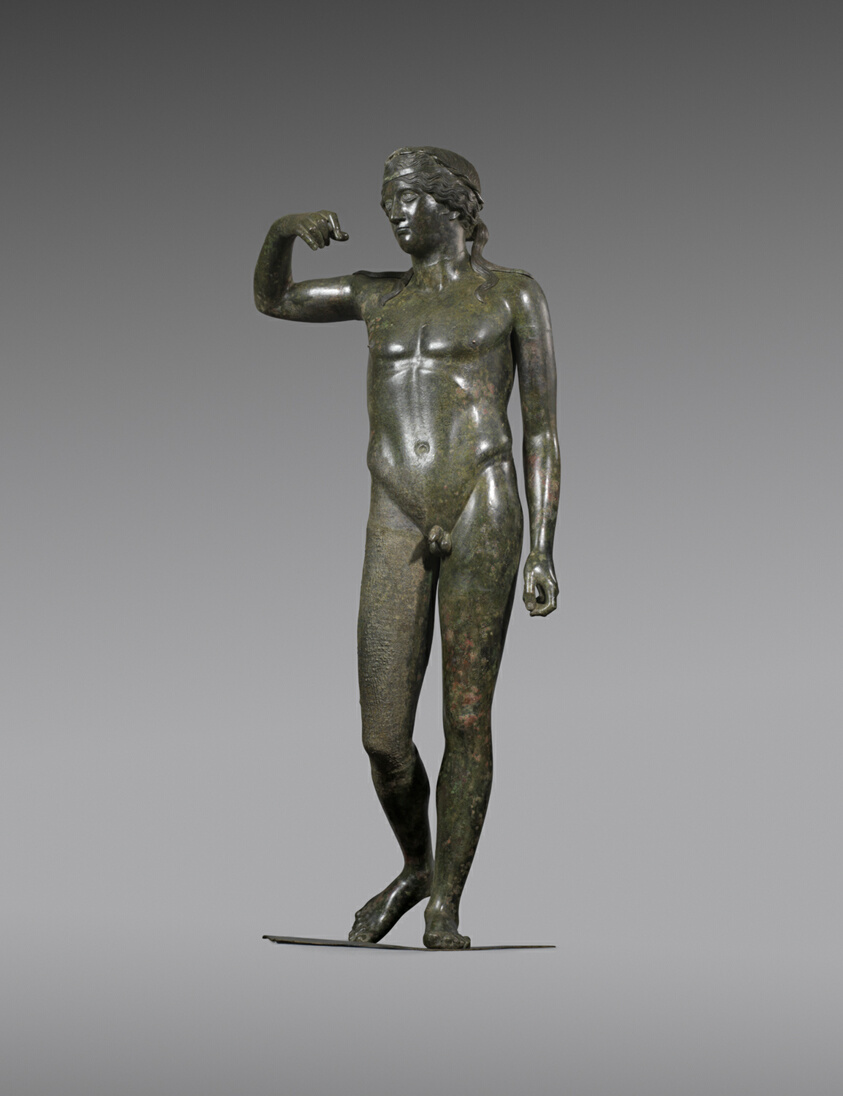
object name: Sculpture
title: Statue of Young Dionysos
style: hellenistic, roman (ancient, style or period)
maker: Hellenistic or Roman; Eastern Mediterranean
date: 100 BCE-100 CE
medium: Bronze, copper, and silver (modern)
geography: Eastern Mediterranean Region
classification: sculpture; vessel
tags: drinking, theater, gods (deities)